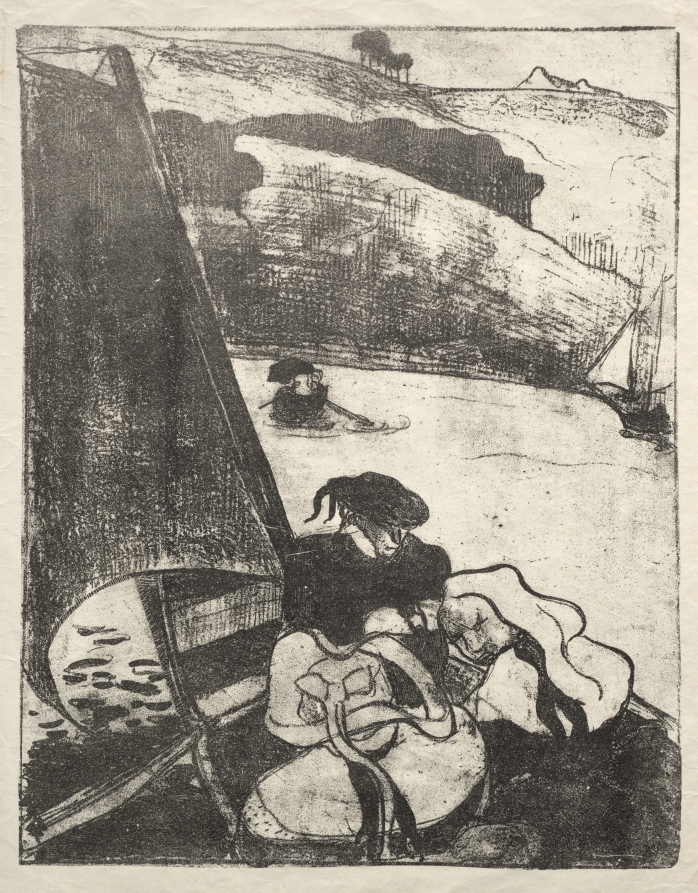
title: Les Bretonneries: The Return from the Pilgrimage (Le Retour du Pardon)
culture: France, 19th century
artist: Émile Bernard (French, 1868–1941)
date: 1889, printed in 1896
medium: zincograph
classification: Print